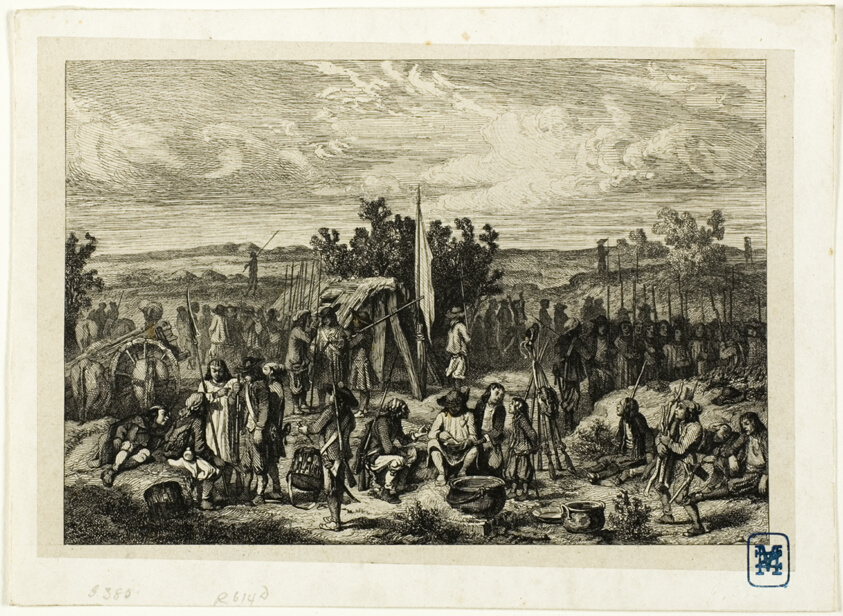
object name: Print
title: A Royalist Encampment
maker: Charles Émile Jacque (French, 1813-1894); after Adolphe Pierre Leleux (French, 1812-1891)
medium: Etching and engraving on light gray China paper, laid down on ivory wove paper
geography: France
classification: etching; print; prints and drawing